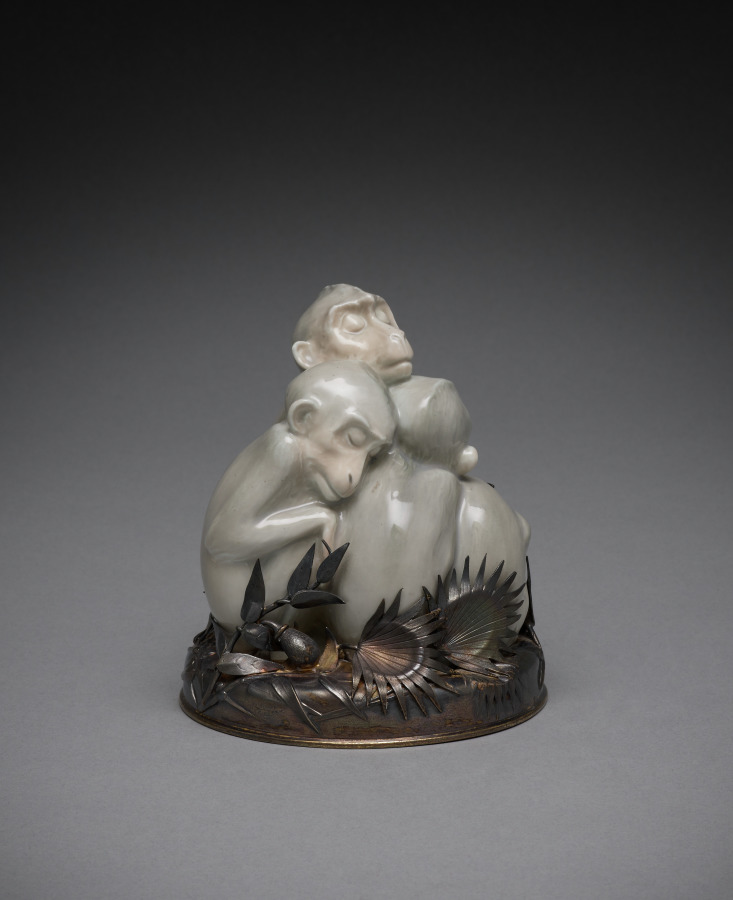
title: Monkey Figure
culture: Sweden, 19th century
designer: Ingeborg Plockross-Iminger (Danish, 1872–1962)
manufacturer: Bing & Grøndahl (Danish, est. 1853)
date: c. 1850–1900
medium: porcelain, silver-gilt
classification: Sculpture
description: This figure featuring three monkeys was designed by the Danish ceramicist Ingeborg Plockross-Iminger. The figure is displayed with a French silver mount that references Japonisme and Art Nouveau styles that were popular at the end of the 1800s and experienced a resurgence in the 1920s because of increased importation of Japanese goods to the West.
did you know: This ceramic figure usually stands alone, without a silver mounting.